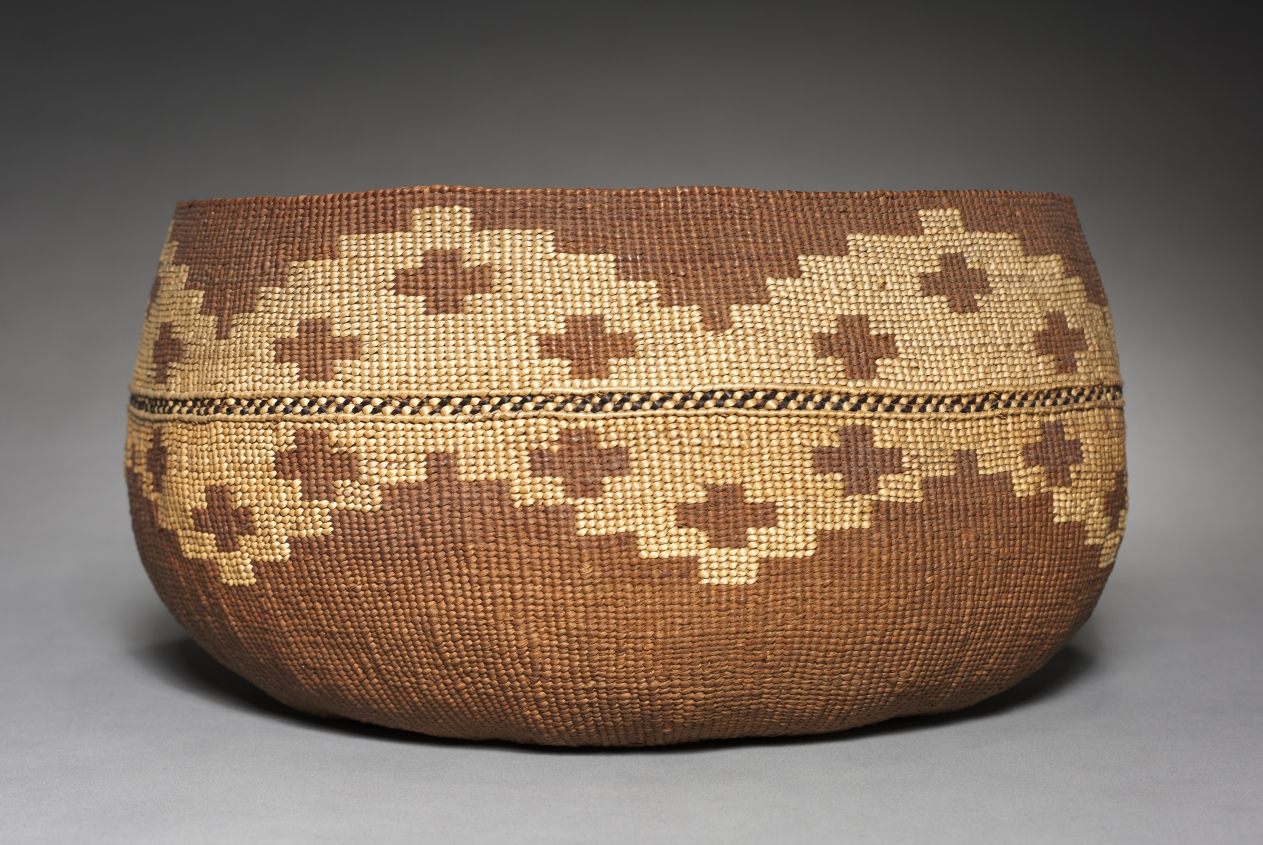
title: Cooking Bowl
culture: California, Karok or Hupa, Unassigned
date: Unassigned, before 1942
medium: twined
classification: Basketry